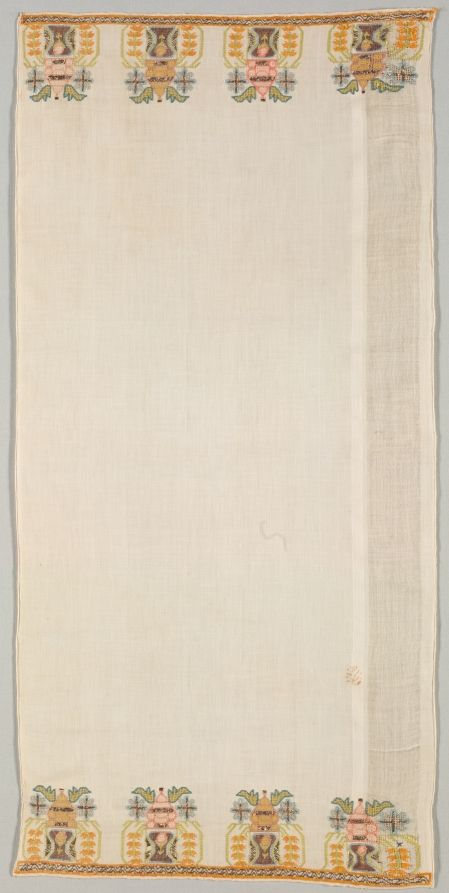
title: Embroidered Towel (Peshkir)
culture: Turkey, 19th century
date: 19th century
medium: embroidery: silk threads and metal strip pushed through fabric, bend and pressed on cotton tabby ground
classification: Embroidery